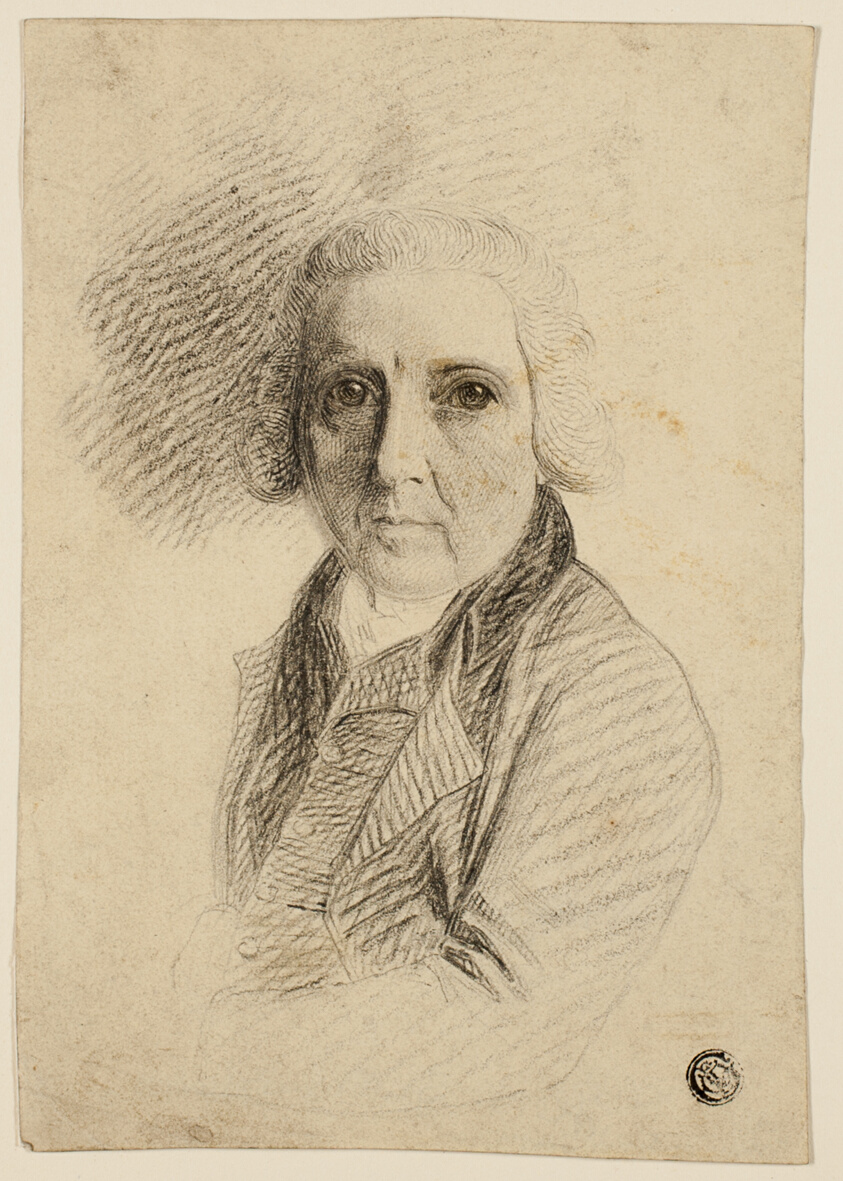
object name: Drawing and Watercolor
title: Josiah Wedgewood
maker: George Stubbs (English, 1724-1806)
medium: Black chalk on cream wove paper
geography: England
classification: chalk; drawings (visual works); prints and drawing